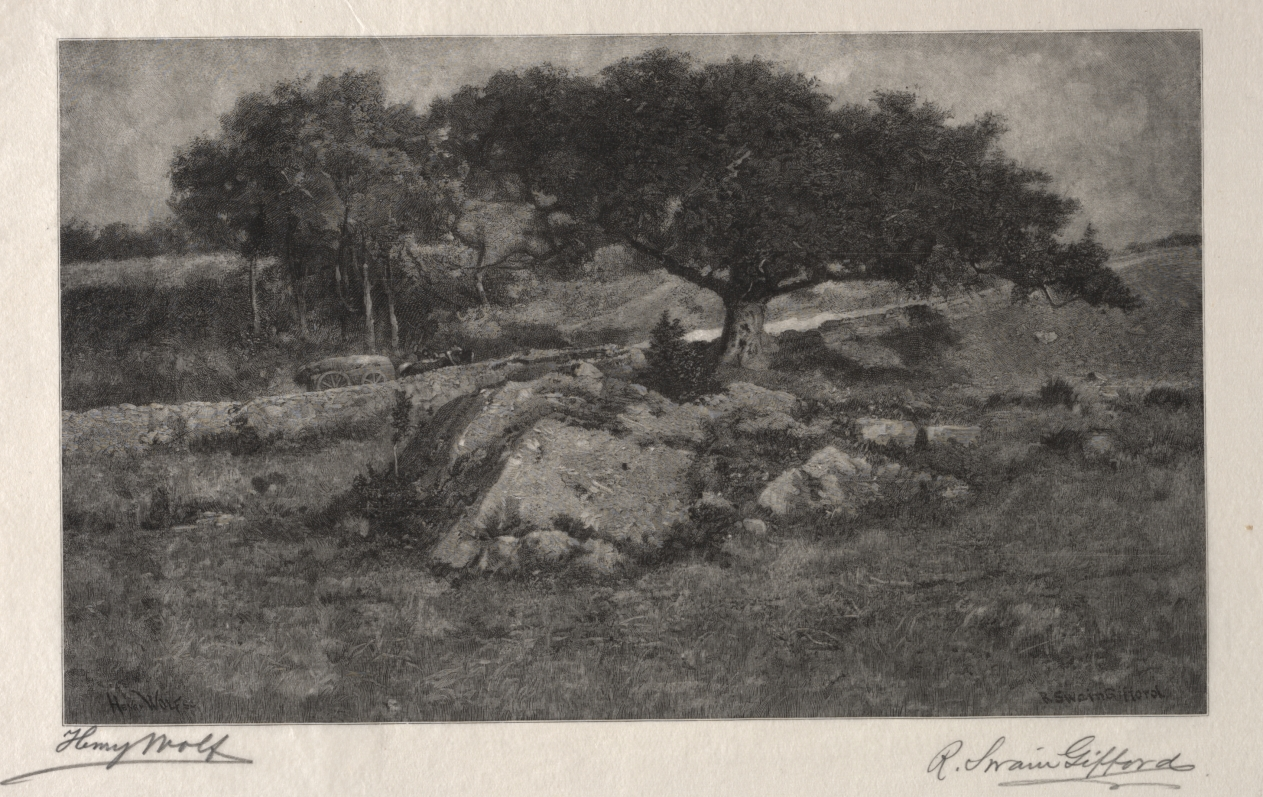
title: The Roadside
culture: America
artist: Henry Wolf (American, 1852–1916)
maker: after Robert Swain Gifford (American, 1840–1905)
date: 1915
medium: wood engraving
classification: Print